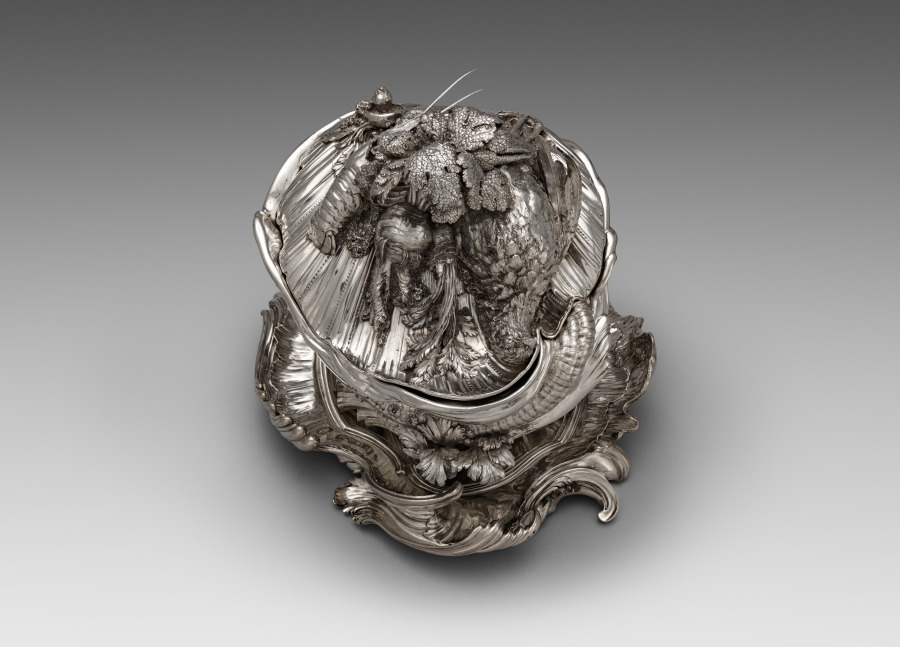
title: Covered Tureen on Stand (Pot-à-oille)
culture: France, Paris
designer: Juste-Aurèle Meissonnier (French, 1695–1750)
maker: Pierre-François Bonnestrenne (French)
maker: Henry Adnet (French, 1745)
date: 1735–38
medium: silver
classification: Silver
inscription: [Maker’s mark of Pierre−François Bonnestrenne, beneath platter; inside tureen (two marks)]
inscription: [Warden's mark for Paris, 1734−1735, beneath platter; inside tureen; inside cover]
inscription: [Charge mark of Hubert Louvet, Paris, 1732-1738, on platter border; beneath platter; beneath tureen; inside cover; inside tureen (two marks)]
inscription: [Discharge mark of Louis Robin mostly used for stamping small work, Paris 1738−1744, on platter border; beneath tureen]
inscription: [Warden's mark for Paris, 1736−1737, on platter border]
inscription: [Possibly British import mark, London, 1925, on platter border]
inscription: [Possibly mark of the British firm Charles & Richard Comyns, on platter border]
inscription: [Discharge of Louis Robin mostly used for stamping gold and silver between 1738 and 1744, beneath tureen; outside cover]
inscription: [Maker’s mark of Henry-Guillaume Adnet, inside cover]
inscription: [Two small undefined marks, inside cover]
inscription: [Under the surface of the platter the engraved signature]: “FAIT-PAR-I-A-MEISSONIER-ARCHITECTTE”; [and the weight] “673=5"; “No. [v] I 50 £ b76Sol”; [and the numbers] “A nº 1”; “A nº2”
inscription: [On tureen lip]: "MEISSONIER"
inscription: [On tureen lip]: “A nº 3”; “A nº2” [in order to place the tureen correctly on the stand]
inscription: [Numbers engraved on the stand, the tureen, and the cover to show how the piece should be assembled]: “A nº 1” [on the base of the tureen; beneath the cover; on the platter], “A nº 2” [on the platter], “A nº 3” [on the exterior rim of the tureen], “A nº4”; “A nº 5” [outside the cover], “A nº 7” [on the border of the platter]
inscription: [Two warden's marks for Paris, 1735-1736, beneath tureen]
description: This tureen exemplifies the French Rococo style, an artistic movement celebrating naturalistic forms that developed in Paris during the early 1700s. In contrast to classical, controlled symmetry, Rococo forms morph, twist, and spill into the space around them. Meissonnier embellished this tureen in a picturesque arrangement of vegetables and creatures, transforming a utilitarian object into a decadent display of wealth and abundance. This masterpiece comes from a set of two tureens commissioned by the English Duke of Kingston during an extended stay in Paris in the 1730s.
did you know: The langoustine, pigeon, and vegetables were cast using real examples giving the silver copies lifelike detail and appearance.